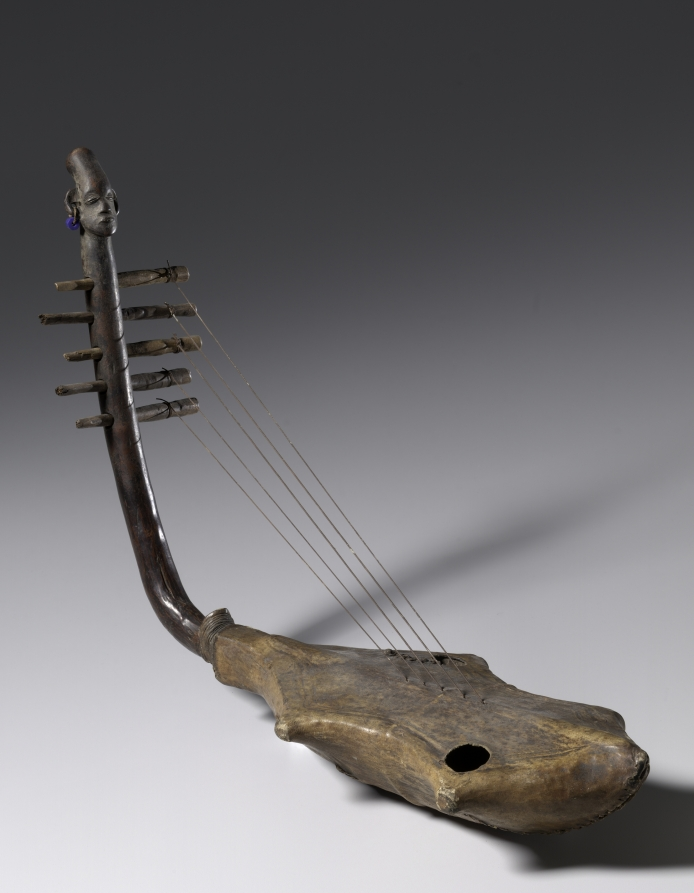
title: Bowharp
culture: Africa, Central Africa, Democratic Republic of the Congo, Mangbetu-style maker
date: by 1928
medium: Wood, rawhide, plant fiber, metal, and glass bead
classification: Musical Instrument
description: Although five-stringed melodic harps with anthropomorphic decorations are found among different peoples in northern Congo, the elongated skull of this work is characteristic of the Mangbetu. Such instruments commonly served to accompany songs by either male or female musicians. Cleveland artist Paul Travis acquired this work and some others during his travels in Central Africa in 1928.